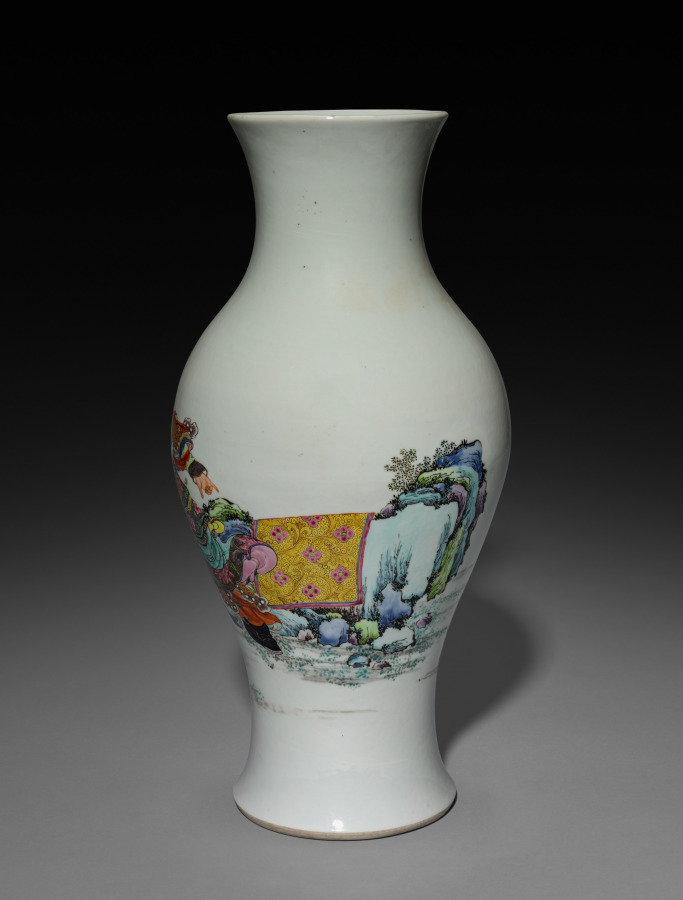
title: Vase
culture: China, Qing dynasty (1644–1911), Qianlong reign (1736–95)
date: 1736–95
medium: porcelain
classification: Ceramic